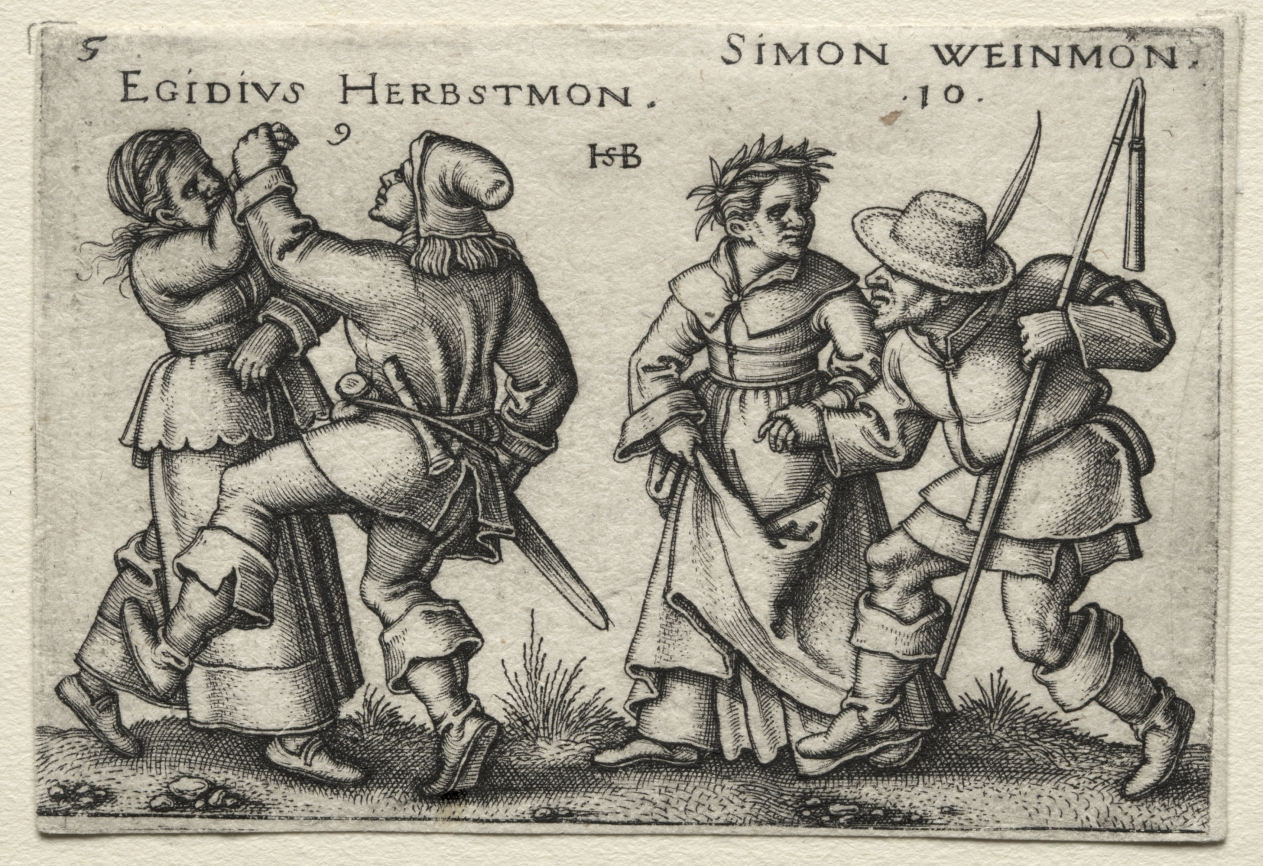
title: The Village Wedding: Egidius Herbstmon / Simon Weimon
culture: Germany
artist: Hans Sebald Beham (German, 1500–1550)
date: 1546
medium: engraving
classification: Print